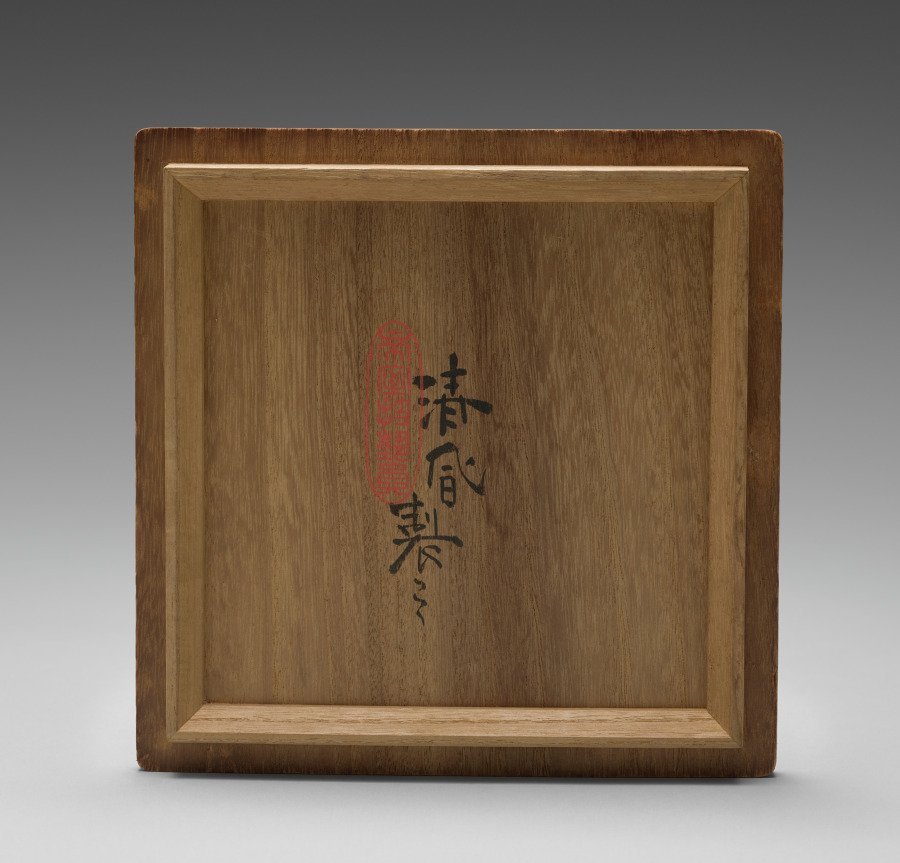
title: Flower Vase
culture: Japan, Meiji period (1868–1912)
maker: Seifū Yohei III (Japanese, 1851–1914)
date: 1912–14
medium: Porecelain with green glaze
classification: Ceramic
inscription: The vase's box lid identifies the vase as hisokuyō (C. mise yao 秘色窯), or “mysterious color ware,” style.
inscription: 清風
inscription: 清風制之 【印】帝室技芸員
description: This flower vase has a tall, slightly flared foot and bulbous body with a slimmer neck. It is completely undecorated but for the hisoku, or “mysterious color,” glaze. Its box lid has a red seal with a flower on it, a rather unusual feature also seen on the box for the green-glazed water container that belonged to the Hosokawa family (see CMA 2022.197).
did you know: The vase's box lid identifies the glaze as hisoku 秘色 or “mysterious color.”